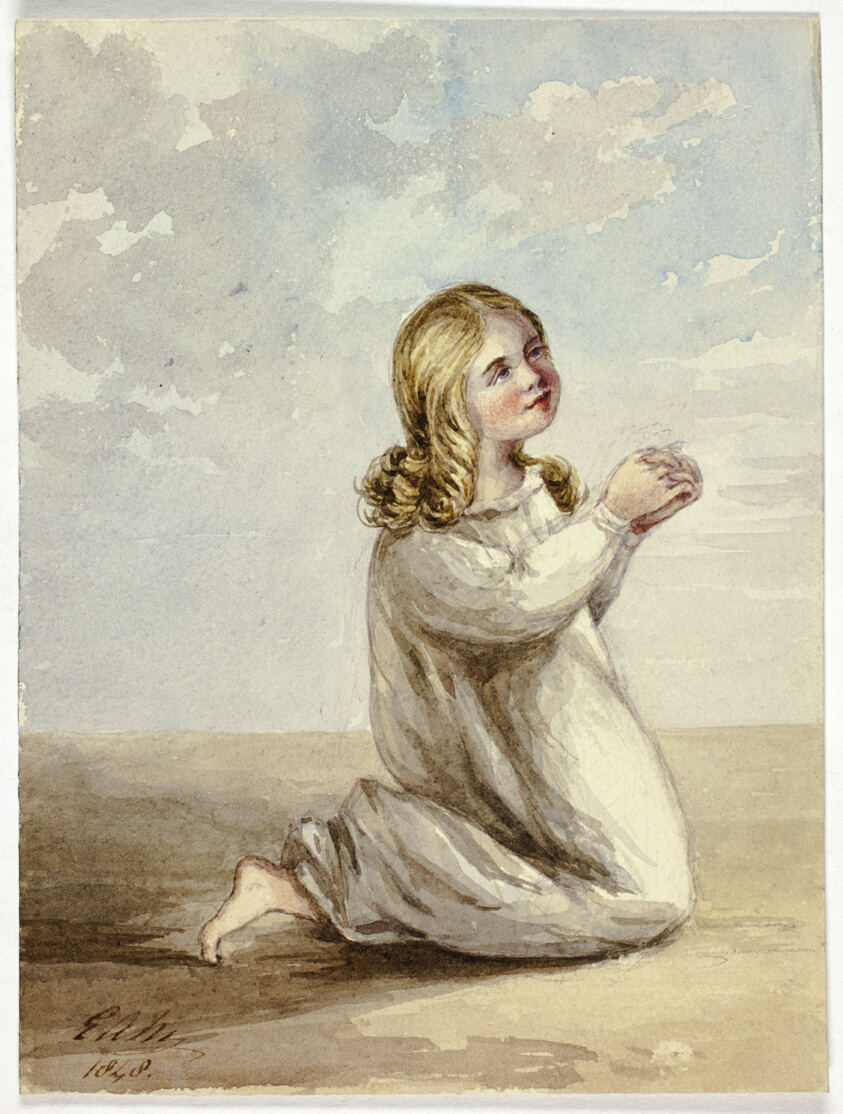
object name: Drawing and Watercolor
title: Child Praying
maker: Elizabeth Murray (English, c. 1815-1882)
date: 1848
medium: Watercolor over traces of graphite on cream wove paper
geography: England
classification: watercolor; drawings (visual works); prints and drawing